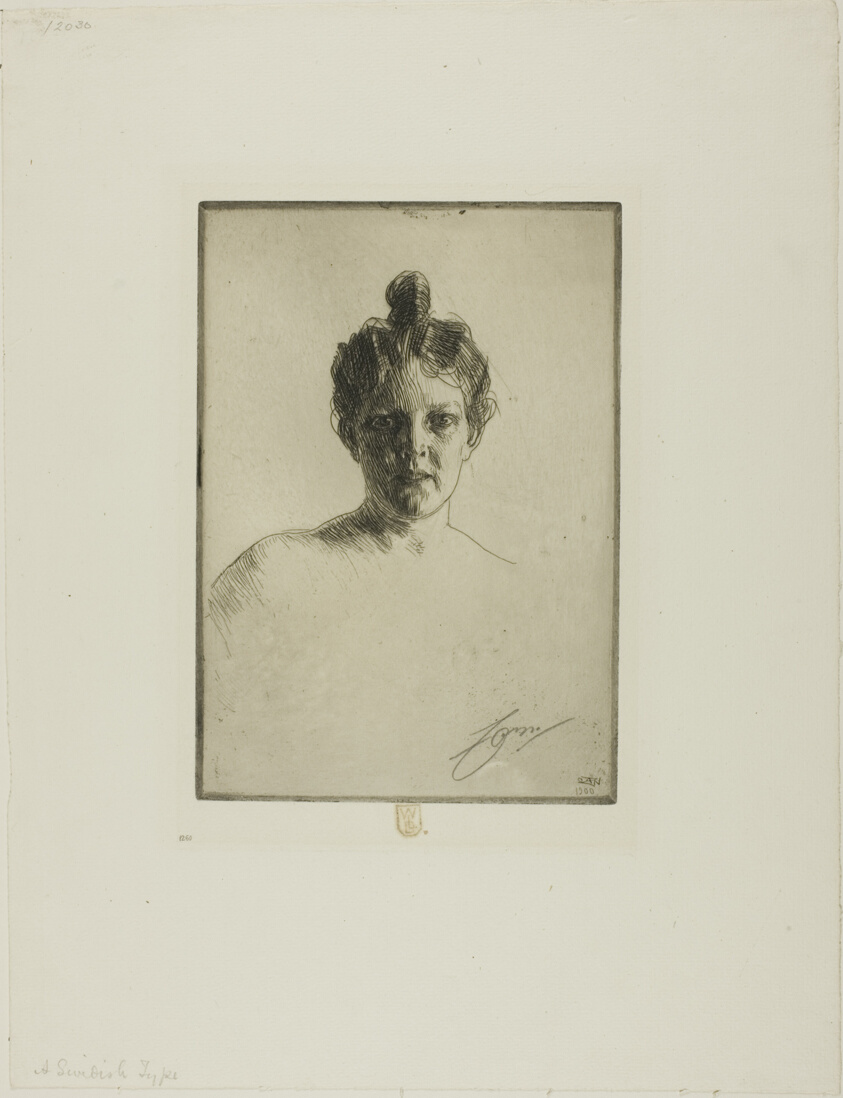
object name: Print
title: Mrs. Runeberg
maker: Anders Zorn (Swedish, 1860-1920)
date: 1900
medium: Etching on ivory laid paper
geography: Sweden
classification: etching; print; prints and drawing